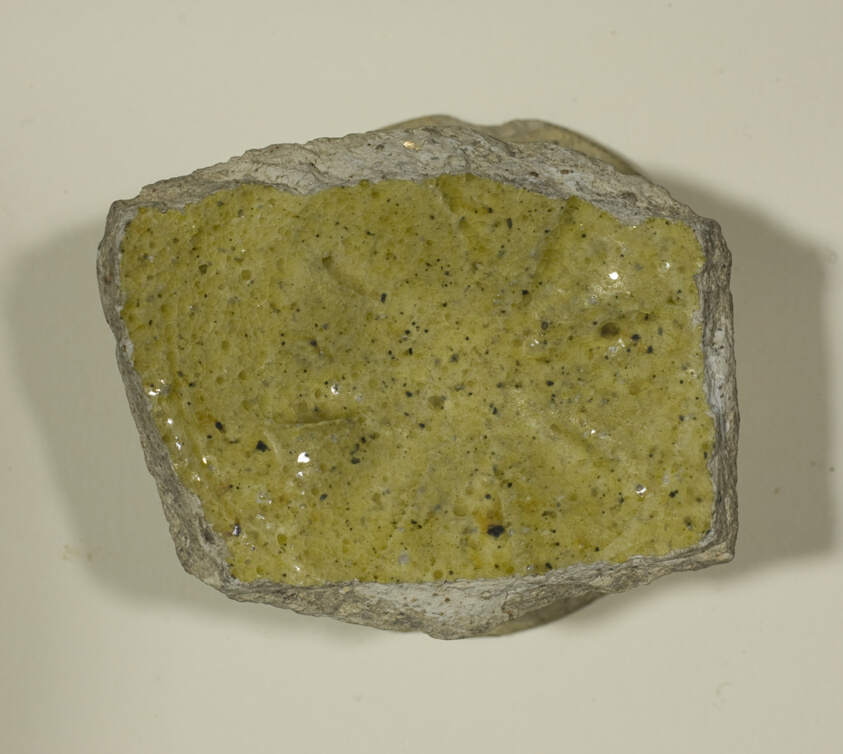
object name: Decorative Arts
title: Fragment of a Bowl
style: byzantine, european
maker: Byzantine (Asia Minor, Constantinople or Greece, Thessaloniki)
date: 13th-14th century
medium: Ceramic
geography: Istanbul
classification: fragment; ceramics; vessel; bowl; asian art; decorative arts